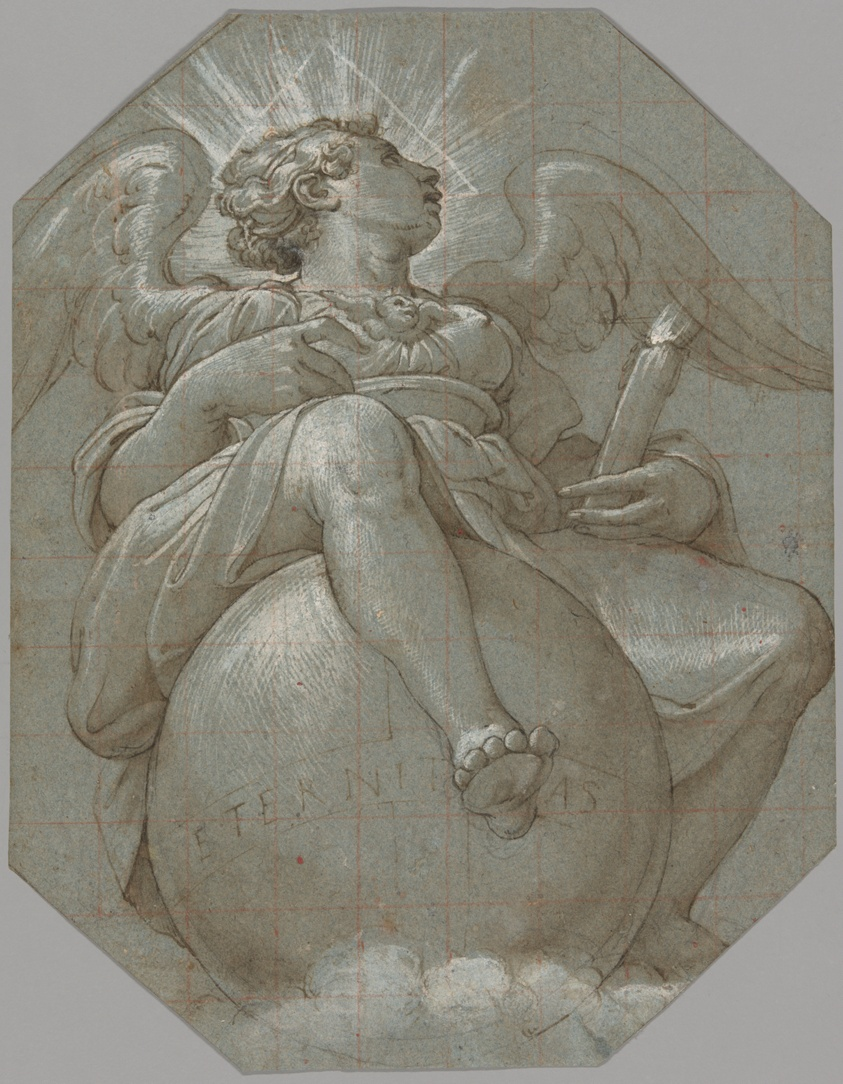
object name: Drawing and Watercolor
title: Allegory of Eternity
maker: Giorgio Vasari (Italian, 1511–1574)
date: 1544/45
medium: Pen and brown ink, brush and brown wash, over black chalk, heightened with white gouache, on blue laid paper, squared for transfer in red chalk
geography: Italy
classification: drawings (visual works); paper; brush and wash; pen and ink drawings; prints and drawing